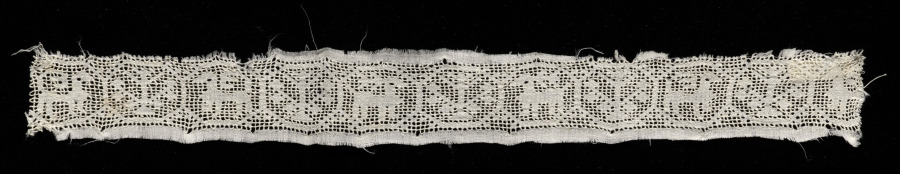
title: Lace fragment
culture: Italy, Venice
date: 1500s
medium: Linen: needle lace (drawnwork or punto tirato) insertion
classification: Lace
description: This fragment contains medallions with an animal, a dog perhaps, alternating with a tree motif.